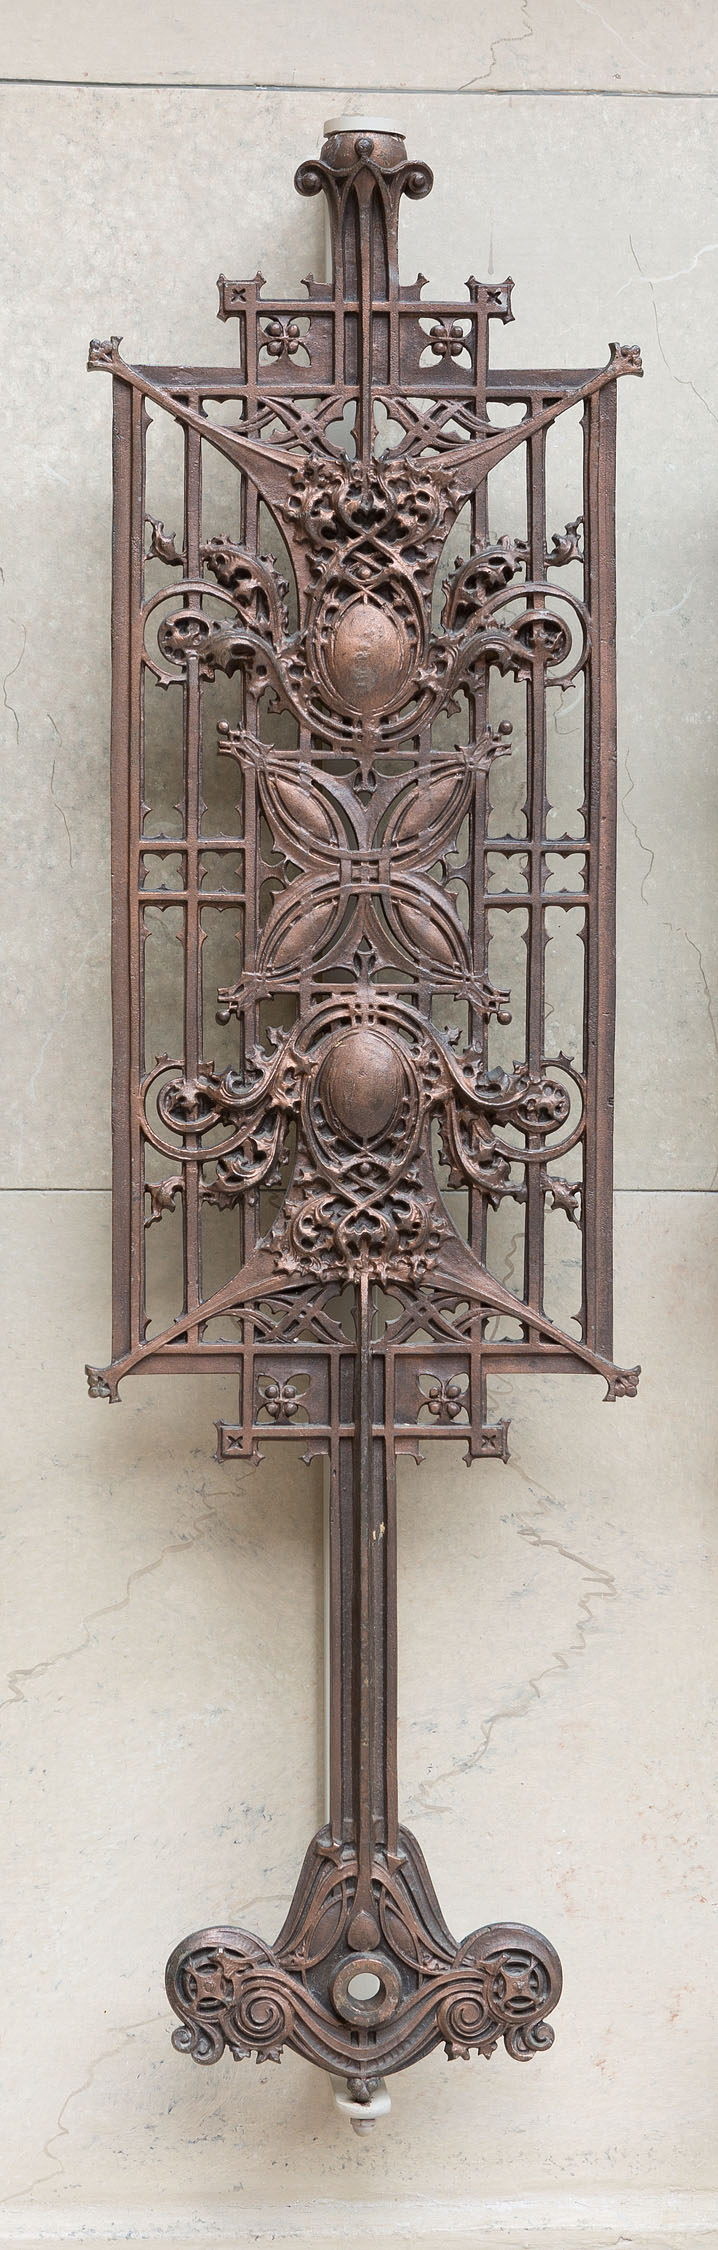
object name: Architectural fragment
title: Schlesinger and Mayer Company Store, Chicago, Illinois, Baluster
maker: Louis H. Sullivan (American, 1856–1924)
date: 1898–1899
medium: Copper plated iron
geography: United States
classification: copper plate; architectural fragment